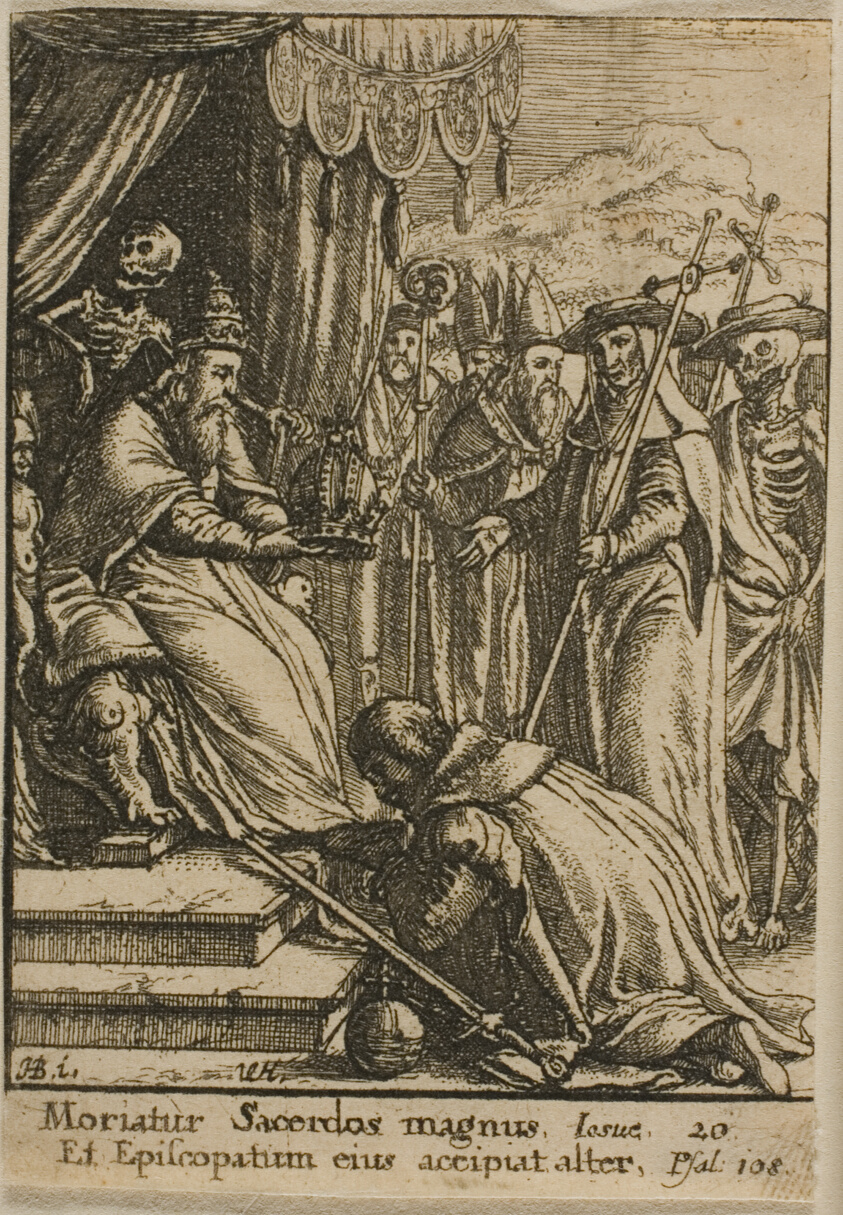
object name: Print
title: The Pope and Death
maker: Wenceslaus Hollar (Bohemian, 1607-1677); after Hans Holbein the younger (German, c.1497-1543)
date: 1651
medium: Etching on ivory wove paper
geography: Bohemia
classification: etching; print; prints and drawing